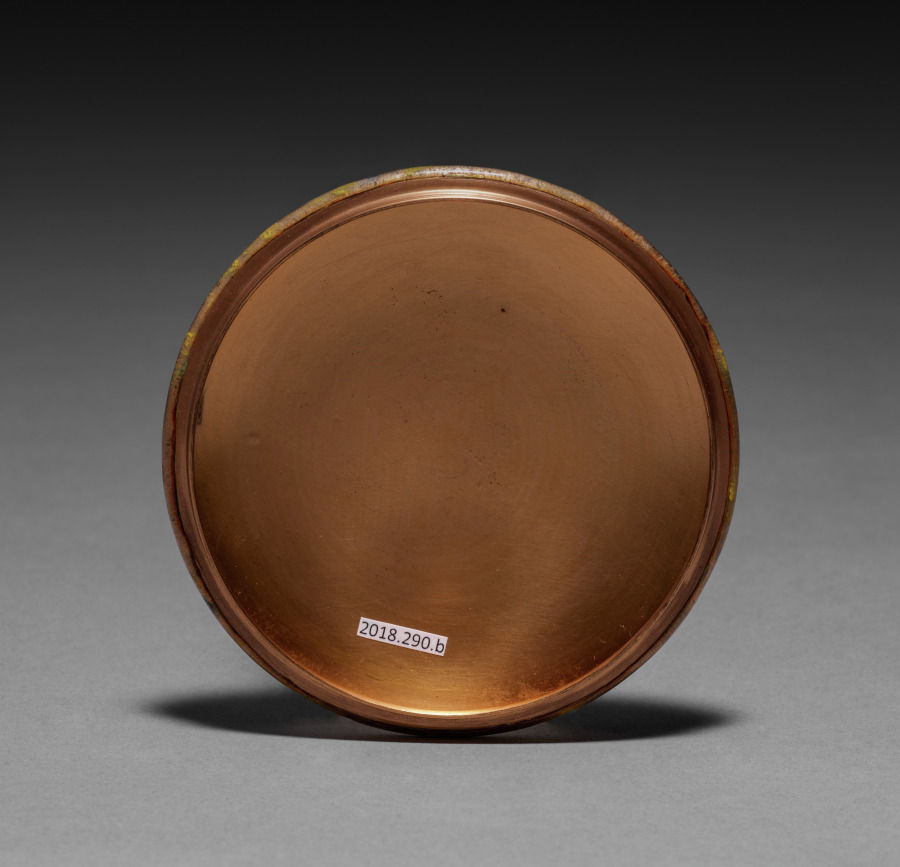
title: Cover for a Box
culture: America, New York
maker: Tiffany Glass & Decorating Company (America, New York, 1892–1902)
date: c. 1898–1902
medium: Favrile glass, enamel on copper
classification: Glass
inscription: Louis C. Tiffany Favrile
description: By 1900 Tiffany had expanded his empire by increasing the firm’s production of “fancy goods,” including inkstands, candlesticks, clocks, small boxes, desk sets, tea screens, and other functional objects. Along with the array of artistic glass designs from his factory in Corona, Queens, works in ceramic, bronze, other metals, and even jewelry abounded. These smaller, more affordable luxury items were designed with as much thought to artistry as the great stained glass windows and lamps through which the firm enjoyed unrivaled success.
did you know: Tiffany's artisans excelled at creating elaborate enameled patterns for luxurious accessories.